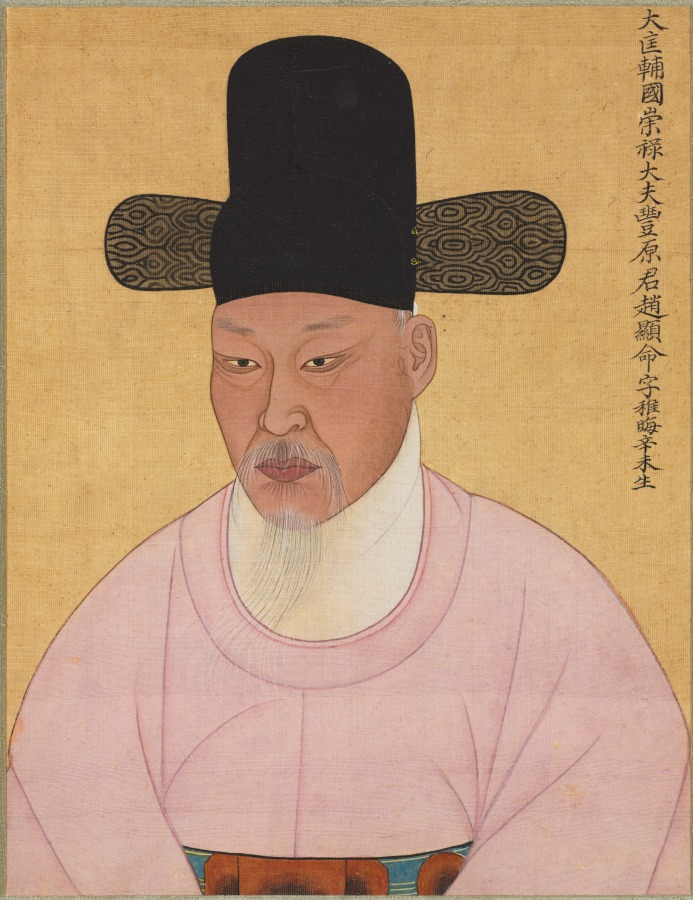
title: Portraits of Cho Hyun-myeong and Cho Jae-ho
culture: Korea, Joseon dynasty (1392–1910)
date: early 1800s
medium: Pair of album paintings; ink and color on silk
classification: Painting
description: These two portraits are of members of the Cho family, which originated from the area of Pungyang. Cho Jae-ho (1702-1762) on the left is the cousin of Cho Hyun-myeong on the right. Both were High State Councilors, called yeong-uijeong, and the Cho family ordered these two portraits as a family honor. Korean portraits were copied for sharing at each family Confucian ritual; similar portraits are still in the collection of the Cho family in Korea.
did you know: These two men belonged to the Pungyang Cho Clan, one of the most important political power houses in 18th-century Korea.